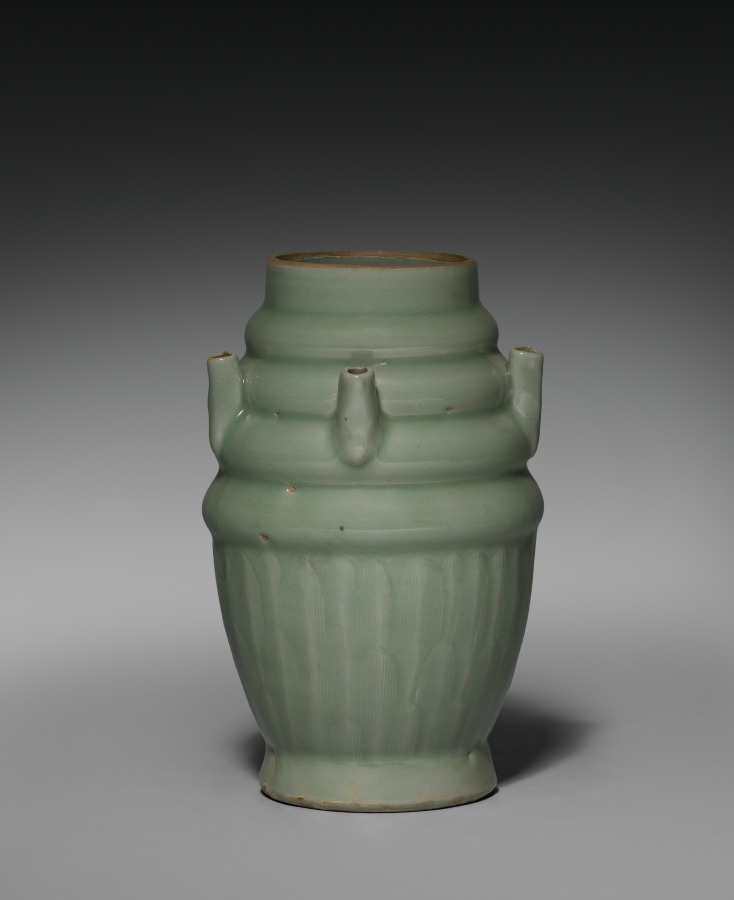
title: Five-Spouted Vase with Cover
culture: China, Zhejiang province, Longquan region, Northern Song dynasty (960-1127)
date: 1000s-1100s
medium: green-glazed porcelaneous stoneware, Longquan ware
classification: Ceramic